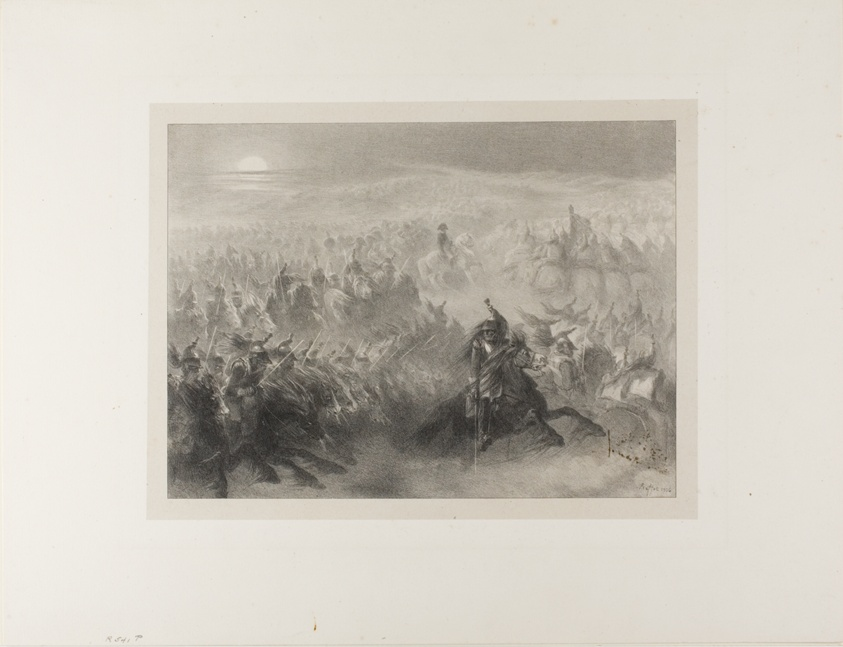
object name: Print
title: The Nocturnal Review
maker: Denis Auguste Marie Raffet (French, 1804-1860); printed by Chez Gihaut Frères (French, 19th century); poetry by Sedlitz (German)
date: 1836, published 1837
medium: Lithograph in black on gray wove chine laid down on ivory wove paper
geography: France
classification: lithograph; print; prints and drawing